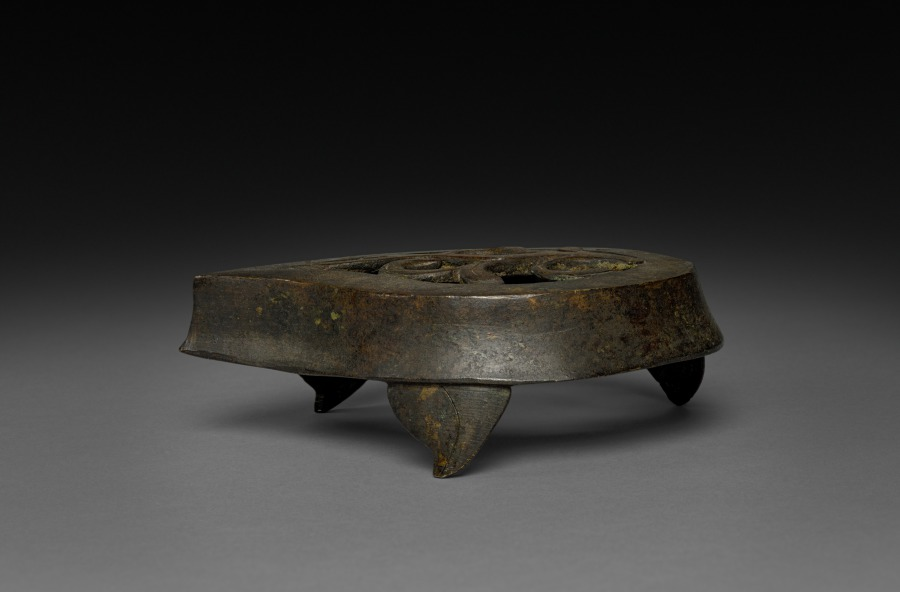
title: Leaf-shaped Trivet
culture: Japan, Meiji period (1868–1912) to Taishō period (1912–26)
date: early 1900s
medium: iron (?)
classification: Metalwork